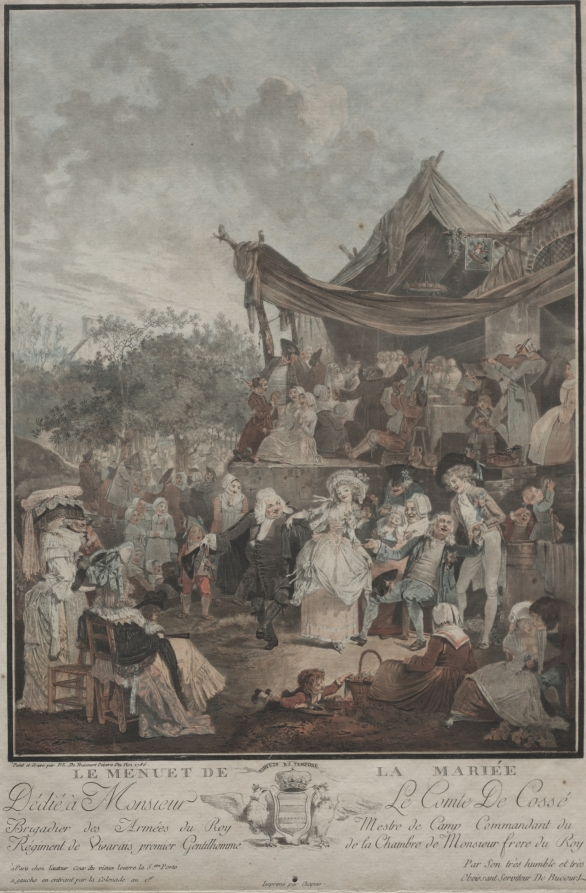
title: Le Menuet de la Mariée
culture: France, 18th century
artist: Philibert Louis Debucourt (French, 1755–1832)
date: 1786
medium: engraving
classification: Print